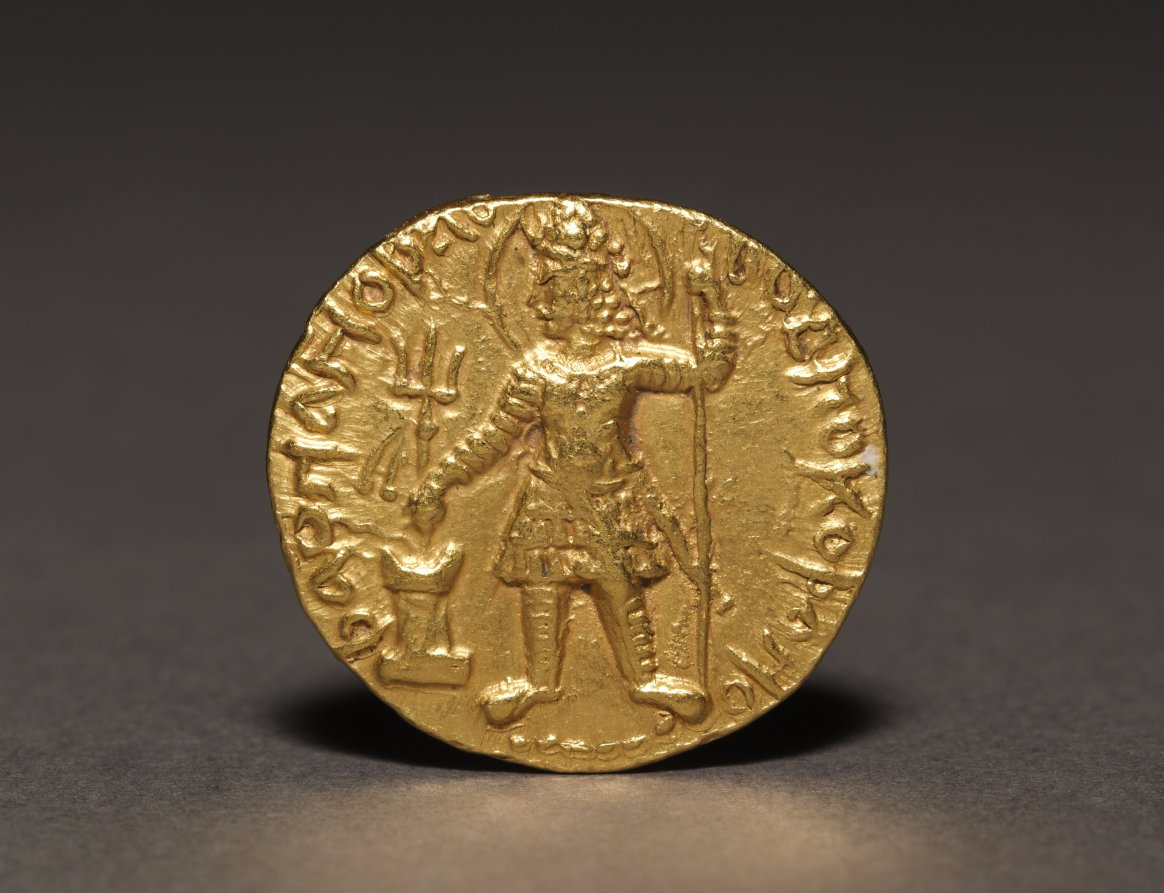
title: Coin of Kushan King Vasudeva I (obverse)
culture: India, Mathura, Kushan period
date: c. 142/145+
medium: gold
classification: Coins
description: This gold coin represents the reign of the Kushana ruler, Vasudeva I. The coin bears a portrait of the ruler on the obverse and various deities on the reverse. It is identified by inscriptions in Kharosthi, the language used in northwestern India during the Kushan period.